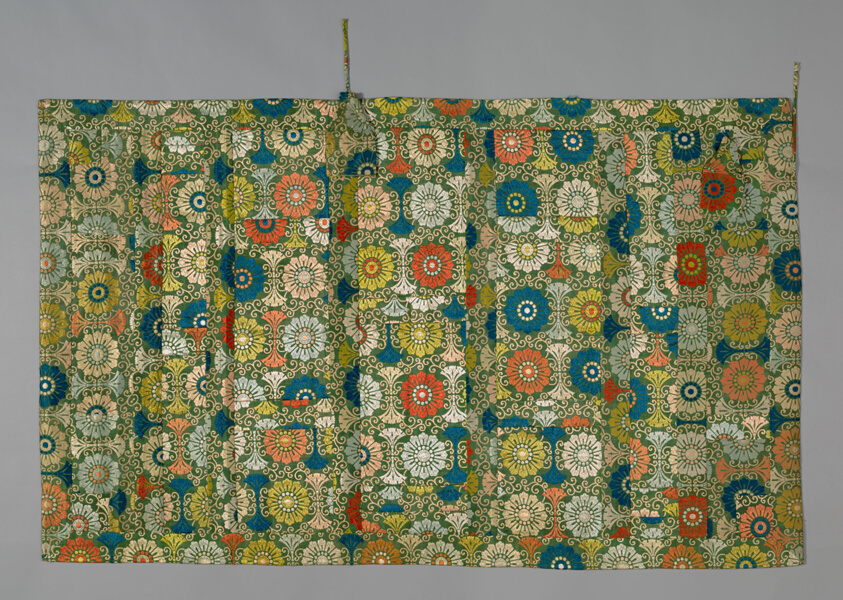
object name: Textile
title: Kesa (Formerly Nō Costume)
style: edo (japanese period)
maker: Japan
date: 18th century, Edo period (1615–1868)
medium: Silk; twill weave with supplementary patterning wefts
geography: Japan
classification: textile; costume; liturgical - buddhist; weaving